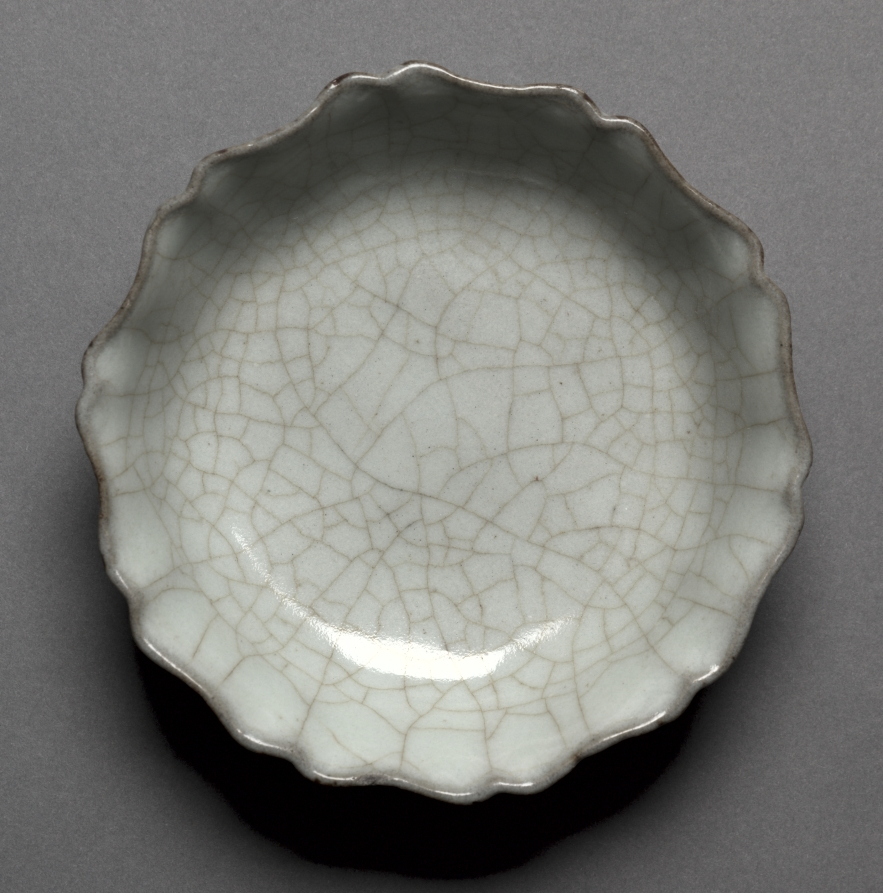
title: Brush Washer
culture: China, Southern Song dynasty (1127-1279)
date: 1200s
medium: porcelaneous stoneware, Guan ware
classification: Ceramic